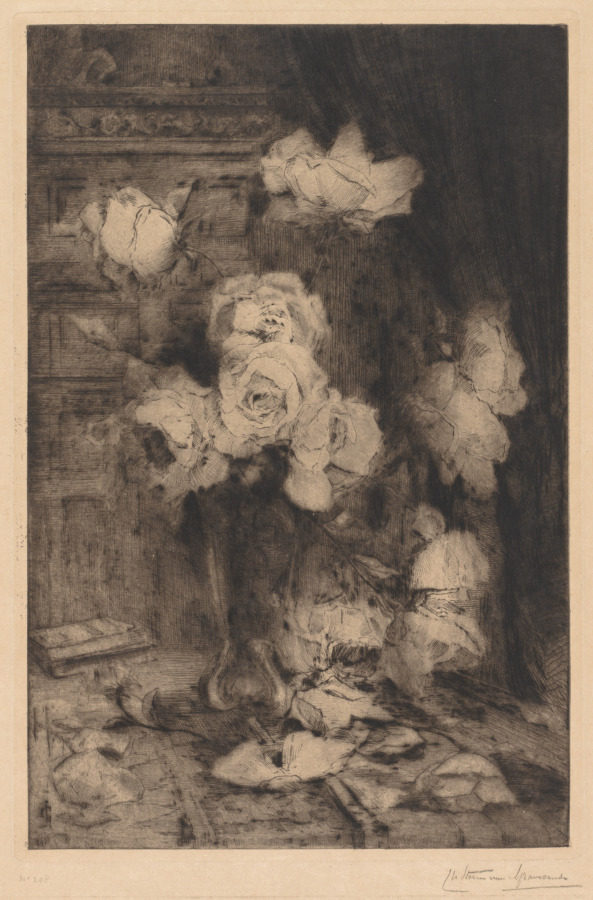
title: Study of Roses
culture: Netherlands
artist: Charles Nicolas Storm van 's-Gravesande (Dutch, 1841–1924)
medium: etching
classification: Print